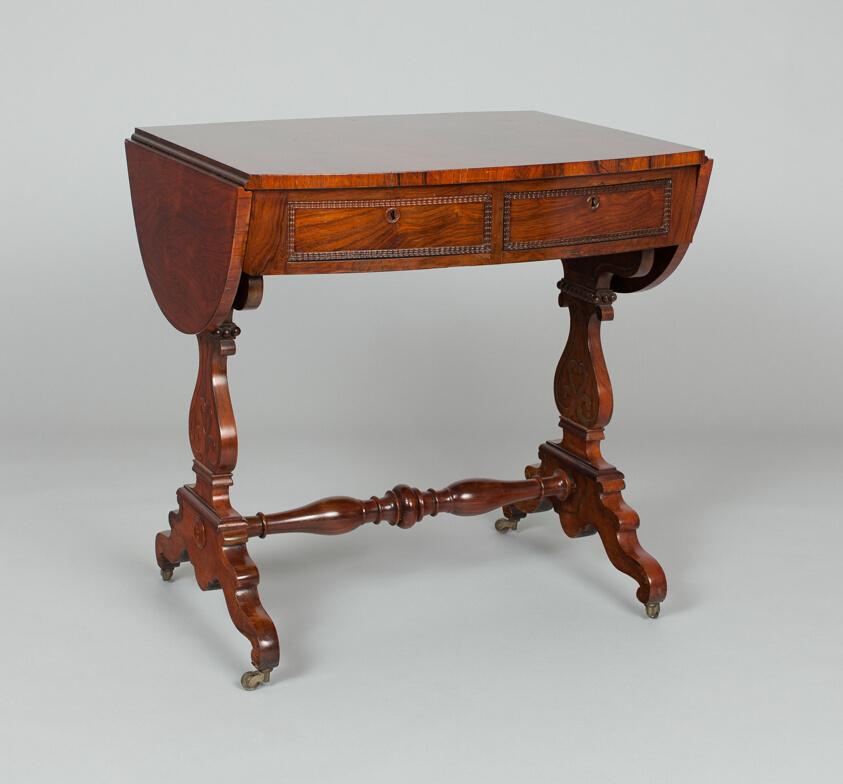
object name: Furniture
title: Sofa Table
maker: John and Joseph W. Meeks Company (American, active 1836–59); New York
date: 1836–46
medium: Rosewood, ash and pine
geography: New York City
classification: table; furniture; american decorative arts; american arts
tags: furniture